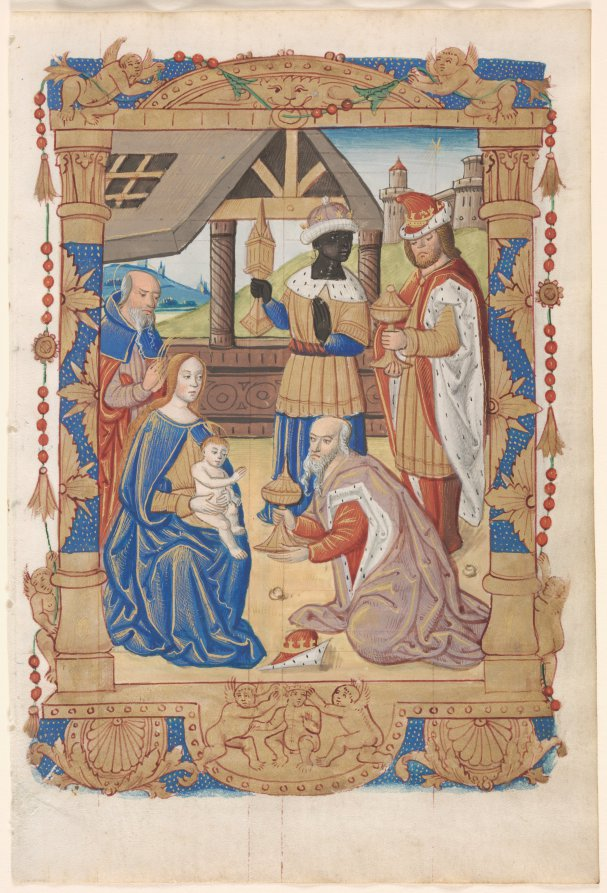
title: Leaf from a Book of Hours: Adoration of the Magi (recto)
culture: France, Rouen, 16th century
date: c. 1510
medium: ink, tempera and liquid gold on vellum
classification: Manuscript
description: Characteristic of the artist's hand, the bright orange-reds combine with deep blues, greens, and an abundance of gold wash in this leaf. He used fine parallel lines or crosshatching in gold to indicate the shading, highlights, and texture of draperies, suggesting some knowledge of printmaking, an art for which Rouen was also an important center. His figures have large, thickly outlined oval faces. This miniature also demonstrates the emerging fashion in both Rouen and Paris for highly involved, Italianate architectural frames: winged putti, swags, urns, garlands, scallop shells, pillasters, and masks. These elements could be assembled in different ways so that no two frames were identical. Rouen in the late 1400s and early 1500s was an established and important center for book production. Richly decorated library texts and books of hours, such as the present leaves, were made in Rouen for sale in the cours des libraires, next to the cathedral.